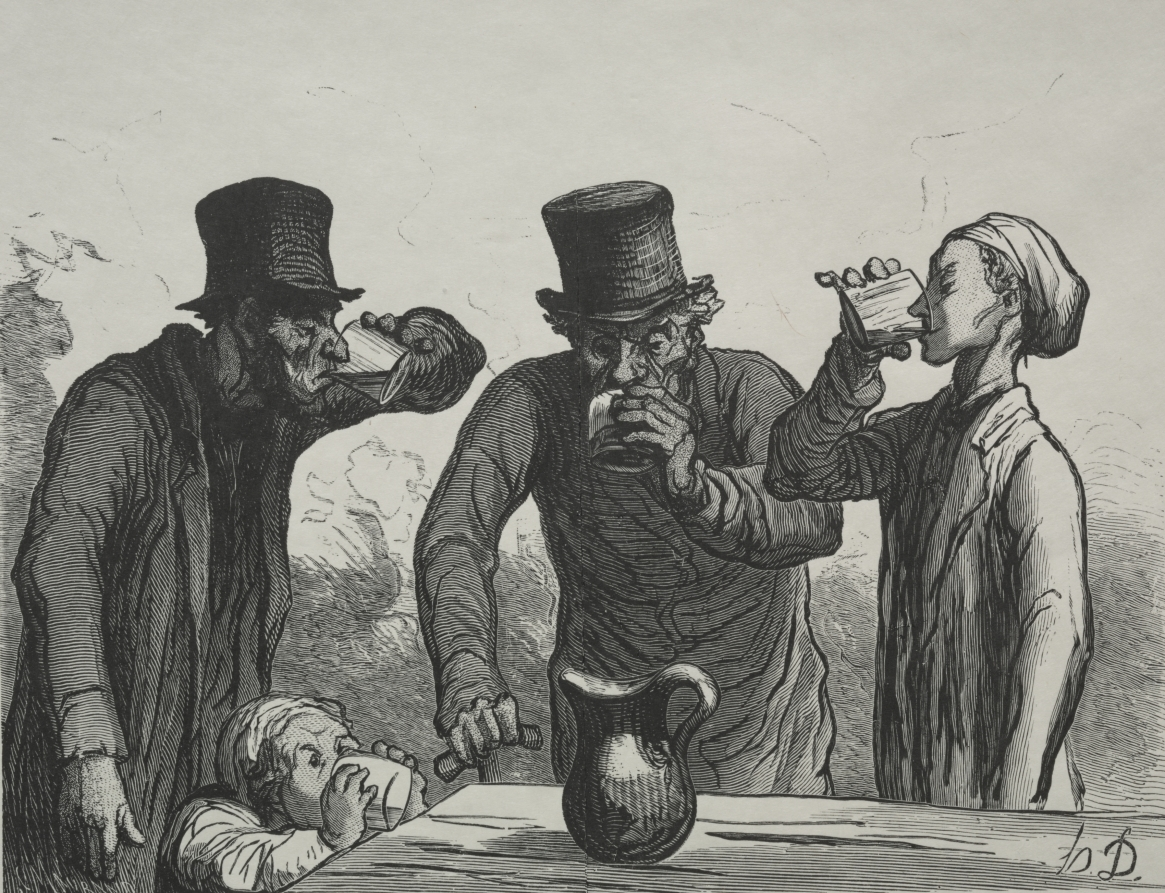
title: Physiology of Drinking: The Four Ages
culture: France, 19th century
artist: Honoré Daumier (French, 1808–1879)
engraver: Charles Maurand (French, 1824–1904)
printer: François Louis Schmied (Swiss, 1873–1941)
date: 1862, printed 1920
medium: wood engraving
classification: Print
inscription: Lower margin, in pencil: 68/75 ; red stamp: FLS